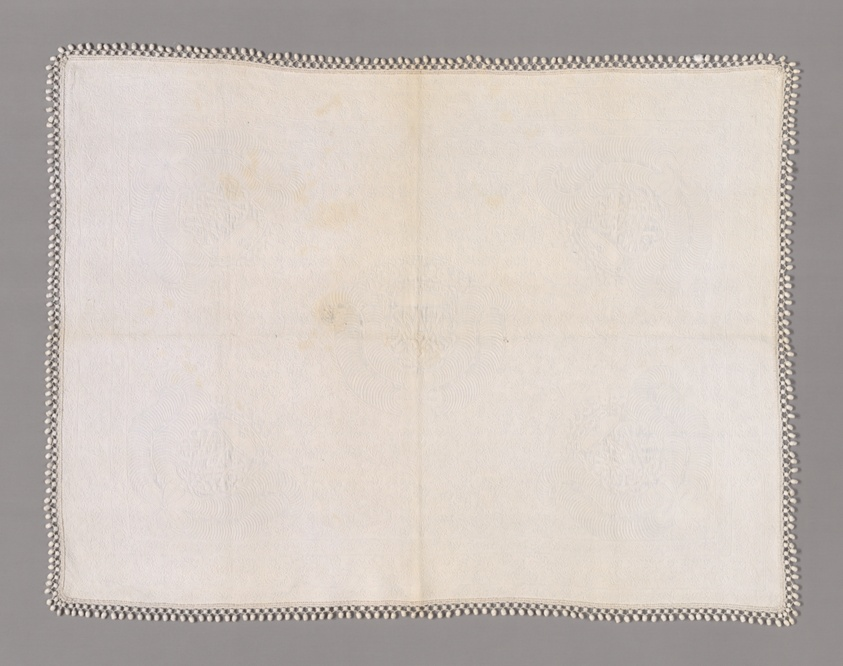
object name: Costume and Accessories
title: Child's Bedcover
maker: England or France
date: c. 1720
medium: Cotton, plain weave; quilted; areas filled with cotton thread; braid and tassels along all four sides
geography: England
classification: textile; needlework - quilt; costume